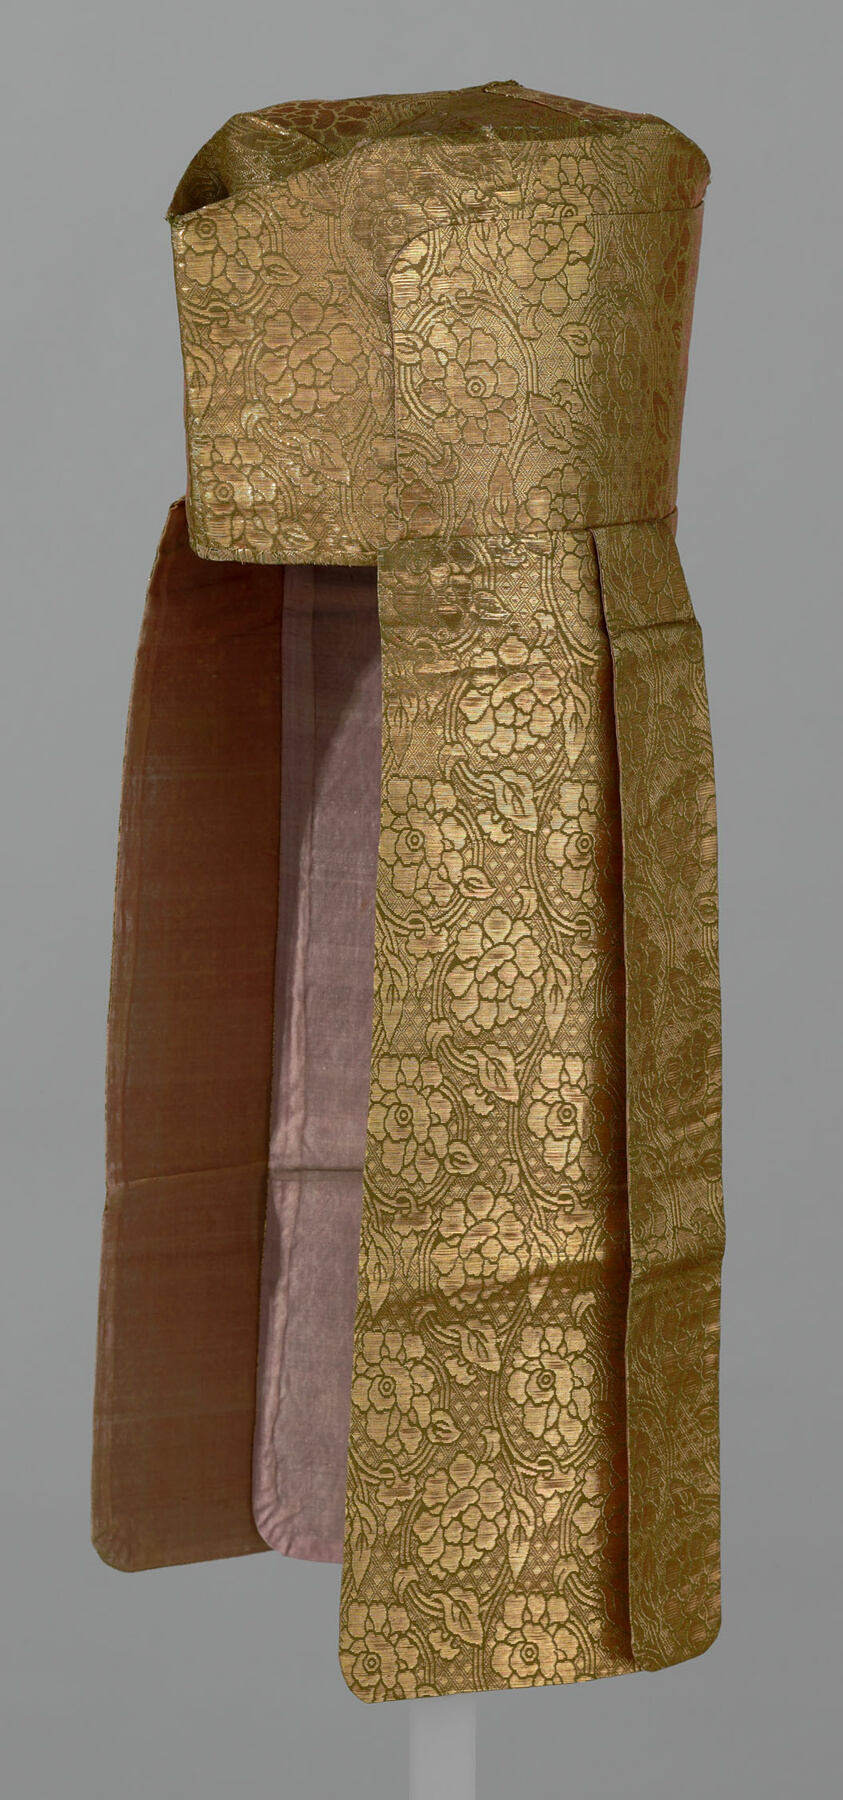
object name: Textile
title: Priest's Hat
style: Japanism, meiji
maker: Japan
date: Late 19th century, Meiji period (1868–1912)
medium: Silk and gilt-paper strip; plain weave with secondary binding warps and supplementary patterning wefts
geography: Japan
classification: textile; liturgical - buddhist; weaving